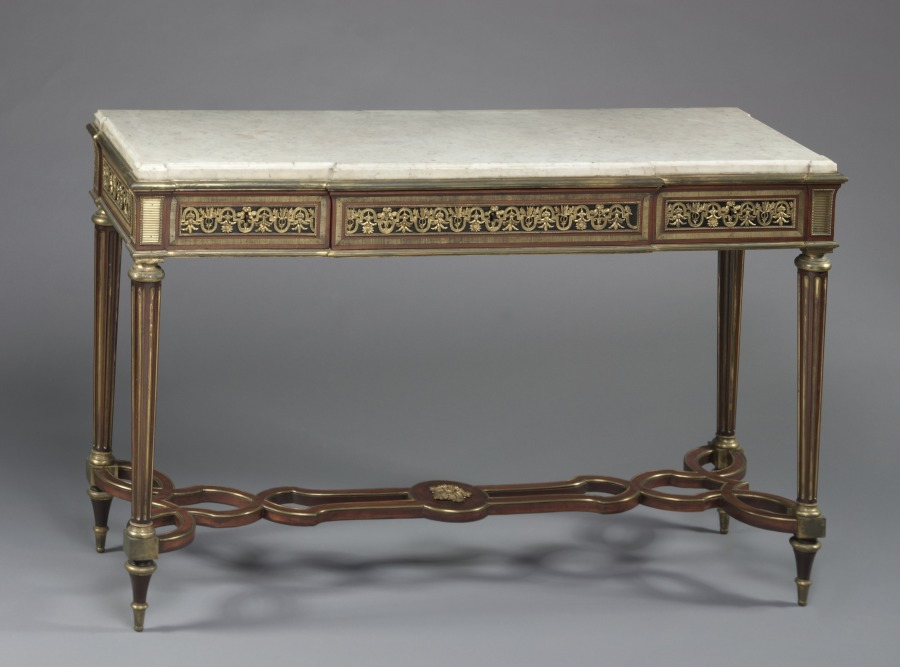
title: Table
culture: France, 18th century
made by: Adam Weisweiler (French, c. 1750–1810)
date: c. 1780–1790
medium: mahogany, gilt bronze, marble top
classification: Furniture and woodwork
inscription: signed twice on back: Weisweiler.